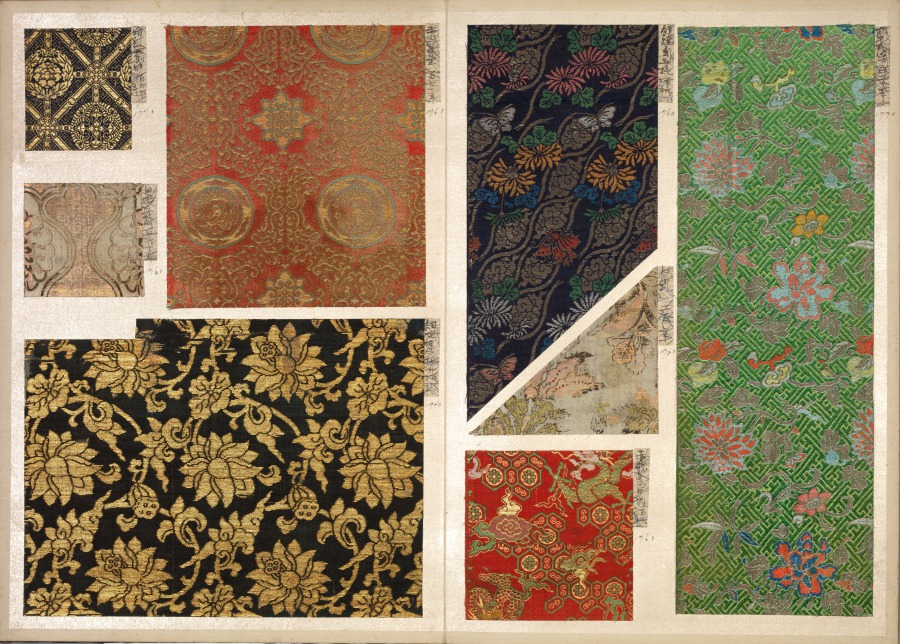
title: Album of Textile Samples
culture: Japan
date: 1790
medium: silk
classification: Textile